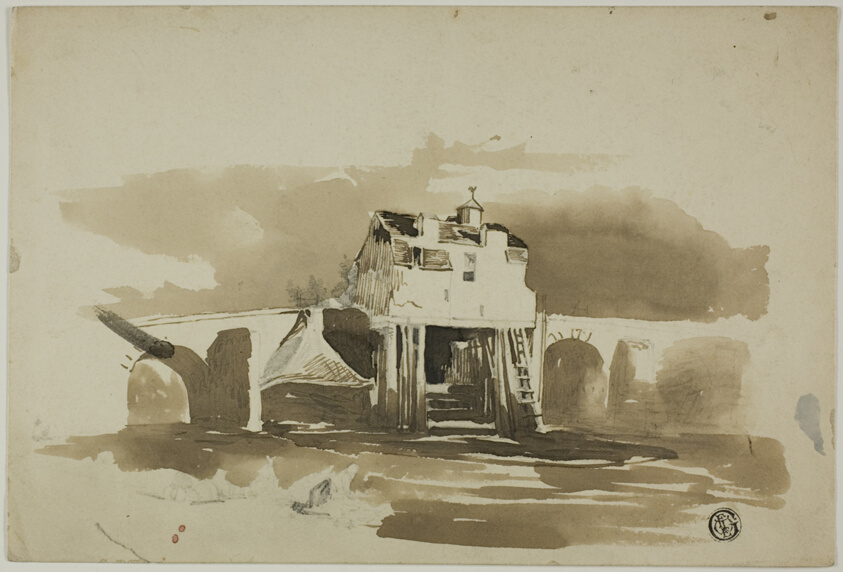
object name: Drawing and Watercolor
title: Bridge North in Shropshire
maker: Unknown Artist; English, 17th/18th century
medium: Pen and brown ink, and brush and brown wash, with touches of graphite, on cream wove paper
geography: United Kingdom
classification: ink or chalk wash; drawings (visual works); prints and drawing